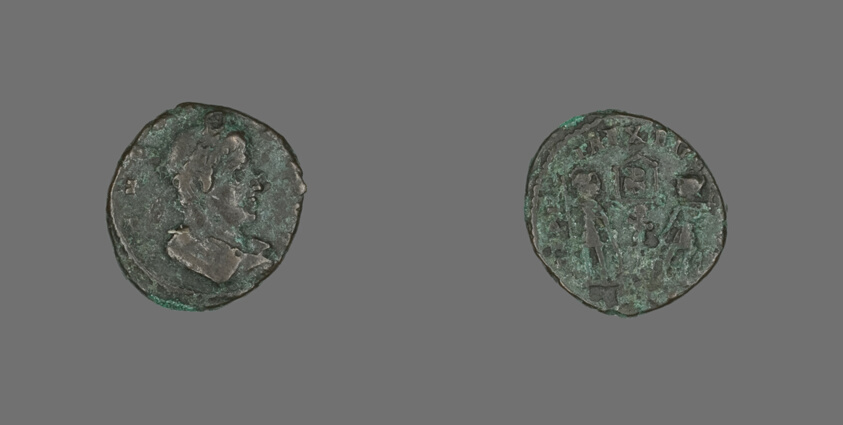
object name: Coin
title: Coin Depicting an Emperor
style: roman (ancient, style or period), ancient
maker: Roman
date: 4th century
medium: Bronze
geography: Roman Empire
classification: coin; ancient art